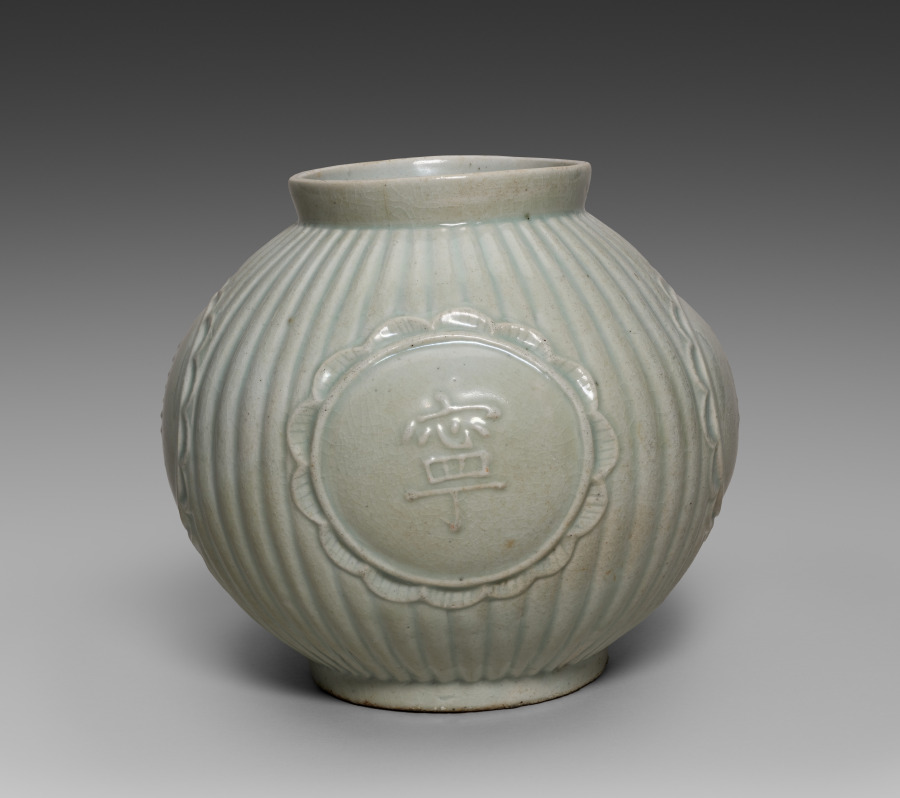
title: Jar with Four Auspicious Characters in Relief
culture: Korea, Joseon dynasty (1392–1910)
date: 1800s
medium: glazed porcelain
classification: Ceramic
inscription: longevity 壽, happiness 福, health 康, and peace 寧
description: This white porcelain vase is decorated with four Chinese characters symbolizing auspicious (hopeful) wishes—longevity, good fortune, health, and peace—each within a floral medallion. Such jars were often presented as birthday or wedding gifts, conveying the giver’s blessings for a long and harmonious life. This object was purchased in 1981 from Kochukyo (壺中居), an antique gallery founded in 1924 in Tokyo, Japan. Many important Korean works remain in Japanese private collections, after being taken there during the Japanese colonial period (1910–45). Consequently, Japanese antique galleries continue to handle Korean antiquities, serving as significant channels for their circulation today.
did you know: This type of jar with auspicious characters was often used as a birthday or wedding gift.